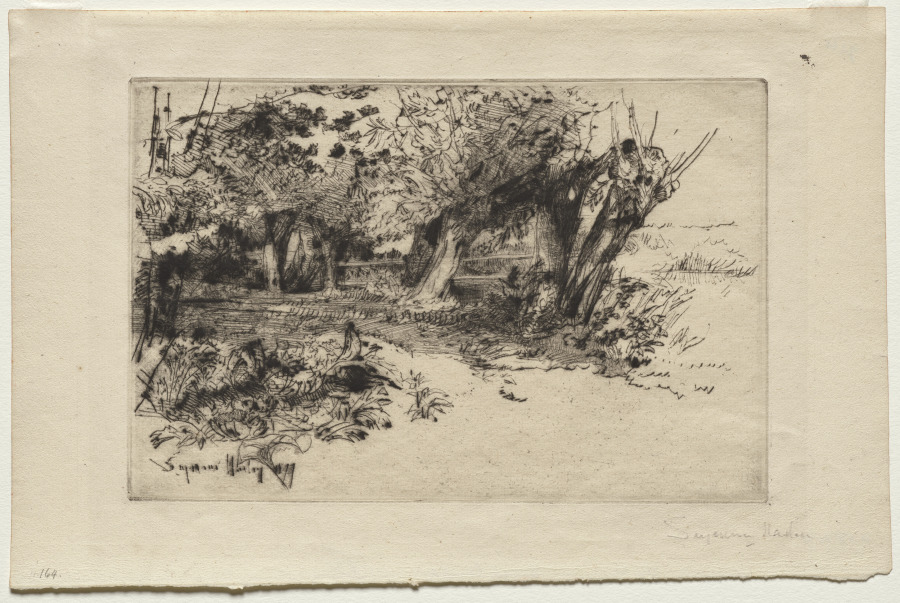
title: The Willows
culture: England, 19th century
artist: Francis Seymour Haden (British, 1818–1910)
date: 1877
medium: drypoint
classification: Print